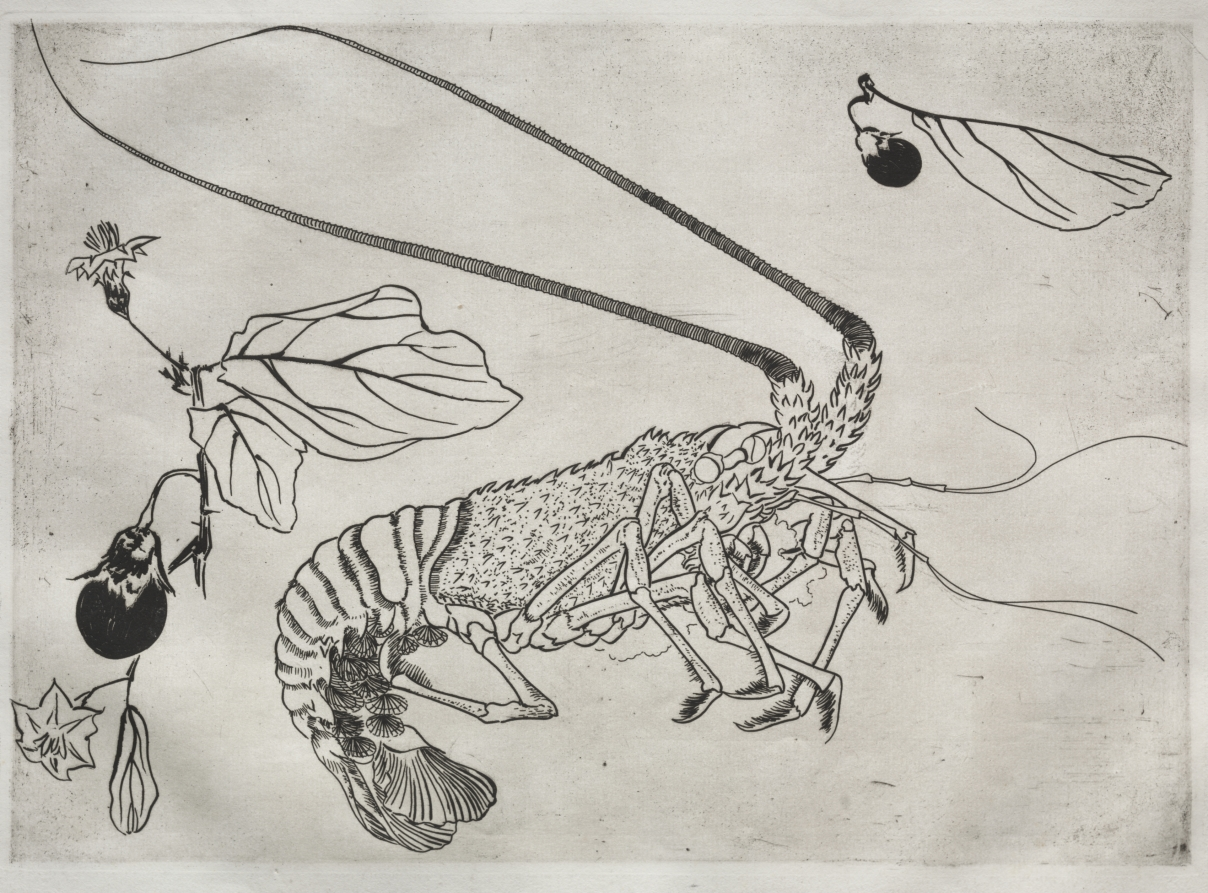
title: Dinner Service (Rousseau service): Large lobster with raised antenna (no. 21)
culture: France, 19th century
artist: Félix Bracquemond (French, 1833–1914)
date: 1866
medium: etching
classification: Print